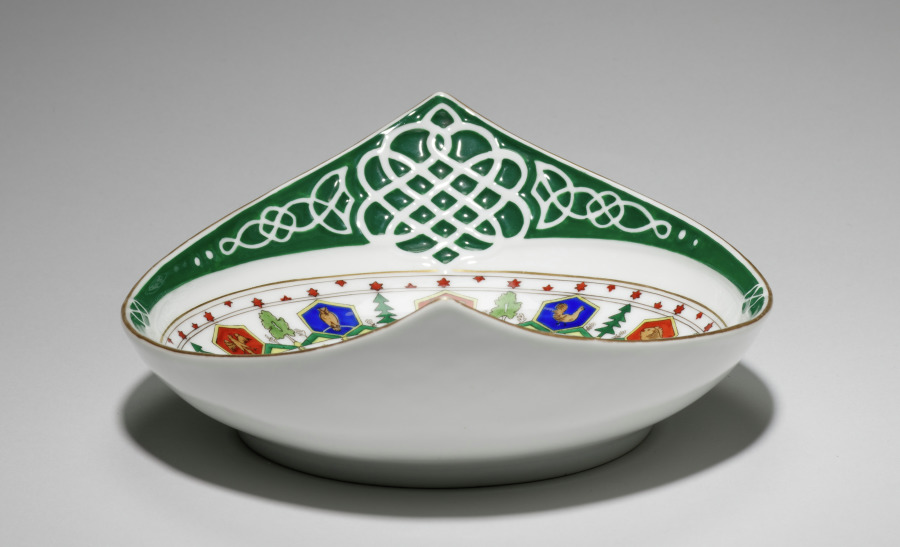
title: Bowl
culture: Russia, St. Petersburg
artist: Kornilov Brothers (Russian, established 1835)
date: between 1891–1917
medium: porcelain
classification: Ceramic